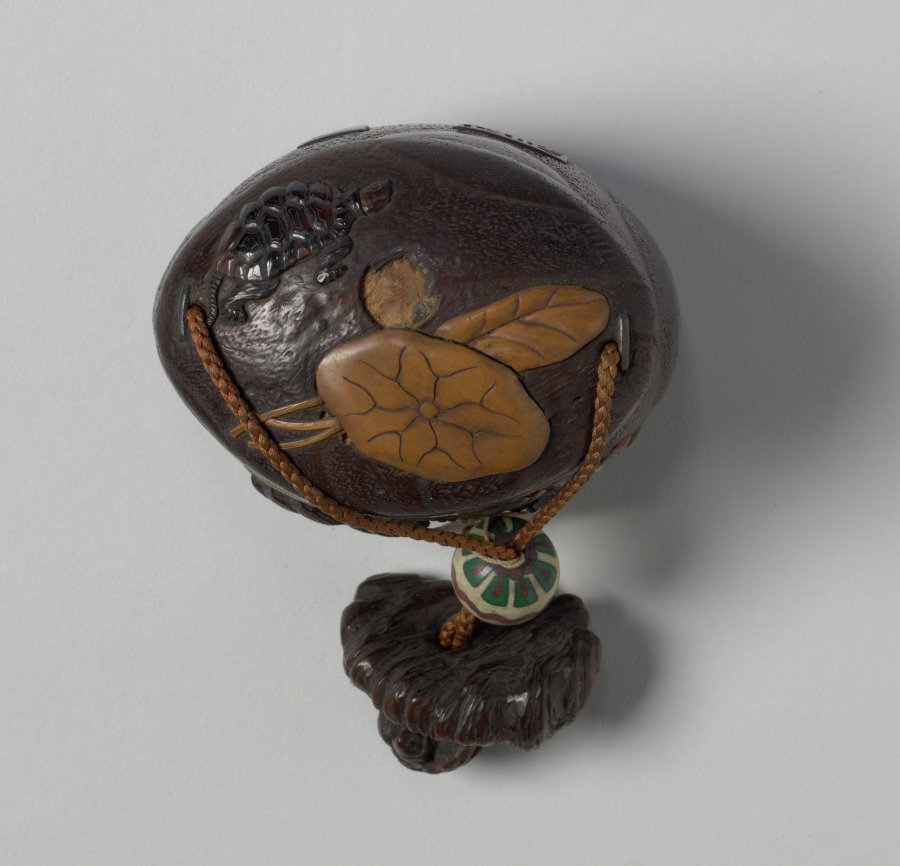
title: Tobacco Box with Turtles in Lotus and Grasses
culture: Japan, Edo period (1615–1868)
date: c. 1760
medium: Box: wood with color and metal, shell, and stone inlay; toggle (ojime): ceramic; netsuke: wood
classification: Miscellaneous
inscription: Box signed: 岷江 花押; sealed: 岷江; netsuke signed: 栗斎